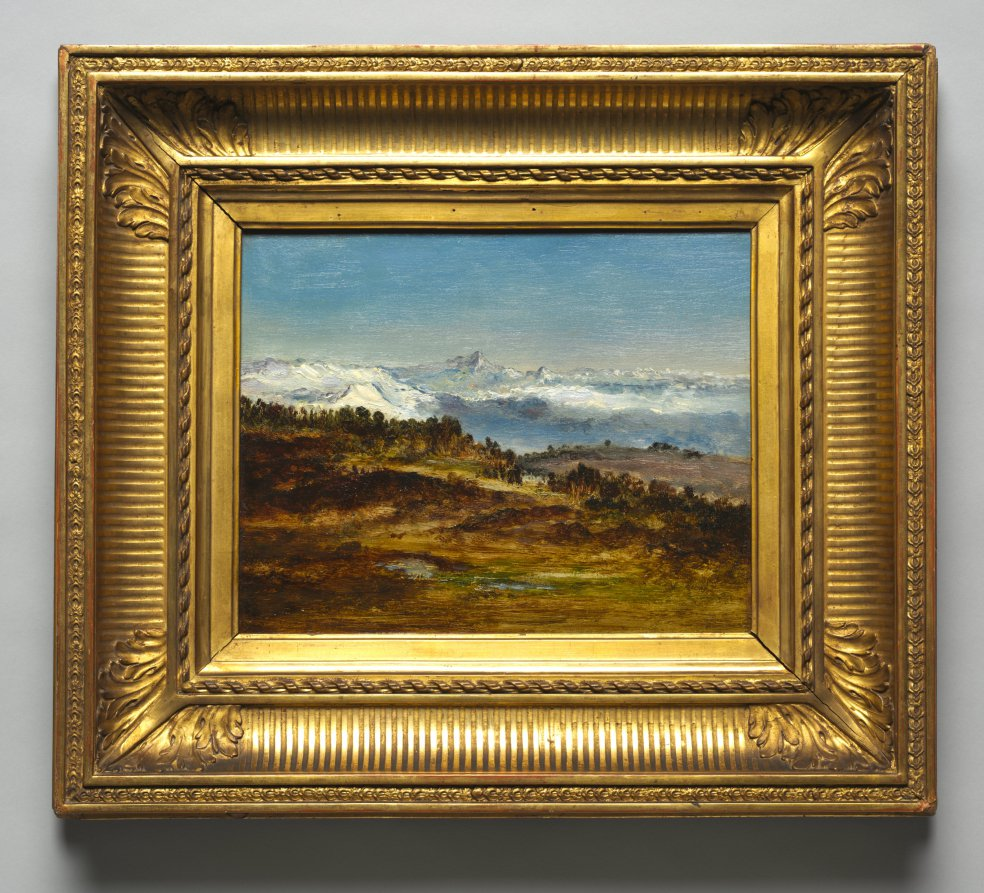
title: The Pyrenees, the Peak of the Midi de Bigorre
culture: France, 19th century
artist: Narcisse Diaz de la Peña (French, 1807–1876)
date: 1871–1872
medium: oil on wood panel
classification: Painting